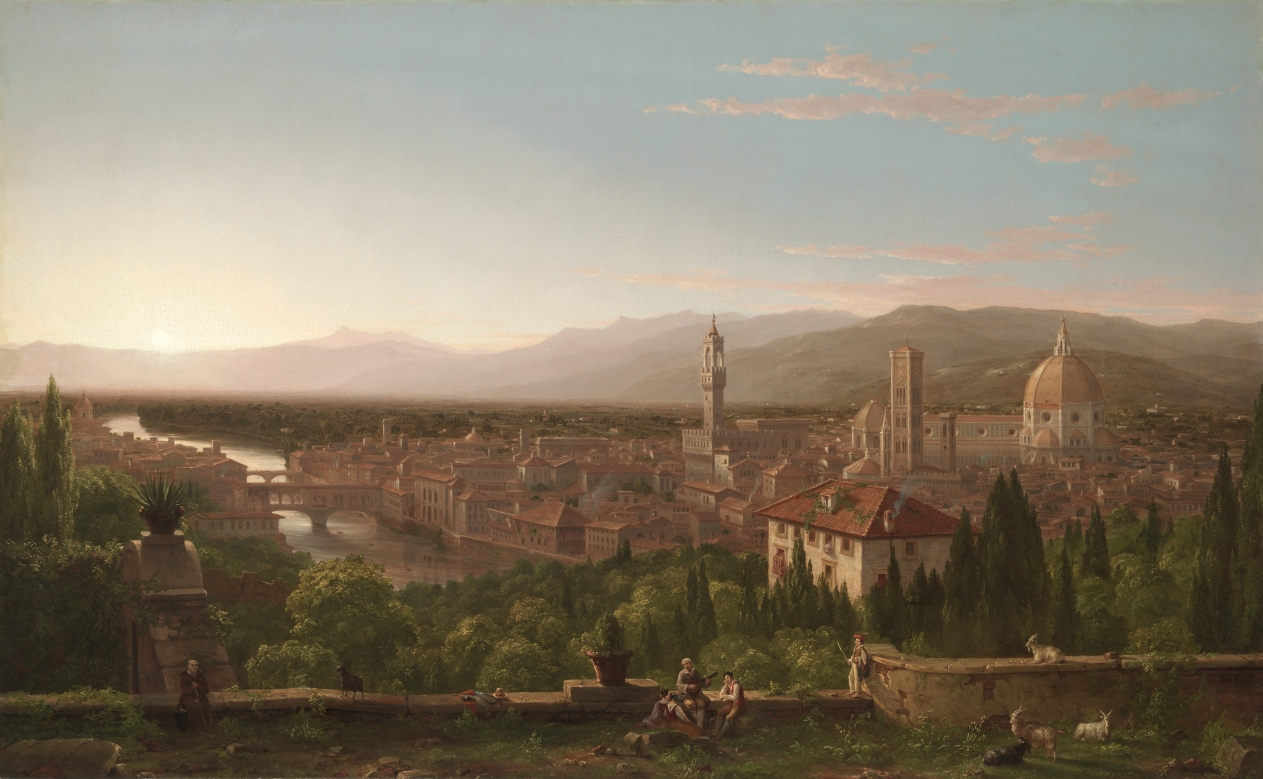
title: View of Florence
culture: America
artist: Thomas Cole (American, born England,1801–1848)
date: 1837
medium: oil on canvas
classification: Painting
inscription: Signed lower right: "T C"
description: Cole visited Italy in 1831 and made a small pencil sketch of this vista of Florence shortly before sunset. In his New York studio six years later, he transformed the drawing into this large oil painting, adding picturesque humans and goats to the foreground. Exhibiting View of Florence alongside a painting of the Catskill Mountains in New York in 1837, Cole set out to prove that he had mastered the very different landscapes of the Old and New Worlds.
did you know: Novelist Henry James grew up with this painting and described its foreground monk as his “constant friend.”